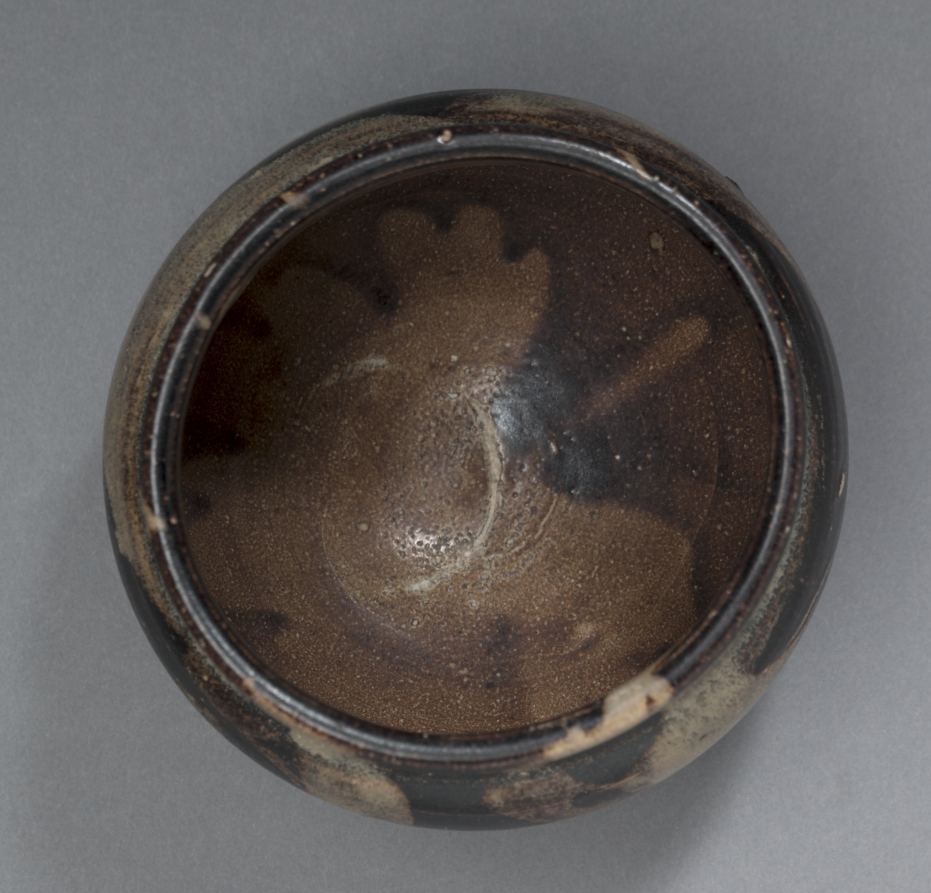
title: Jar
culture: China, Jiangxi province, Jizhou kilns, Southern Song Dynasty (1127–1279) - Yuan Dynasty (1271–1368)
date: 1200s–1300s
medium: Glazed stoneware with resist and slip-painted decoration, Jizhou ware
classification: Ceramic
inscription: jen ch'en nien san yüeh shih jih mai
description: Like the Teabowl with Tortoiseshell Glaze (CMA 2020.177), this jar was made in the Jizhou kilns of southeast China. Producing a variety of innovative dark glaze types, the potter here created a dynamic abstract pattern of waves in the form of light brown strokes brushed over a dark brown glaze.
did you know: To create leaf imprints in Jizhou ware, artisans dipped real leaves in glaze and placed them on vessels, where the leaves would then burn away while firing in the kiln.